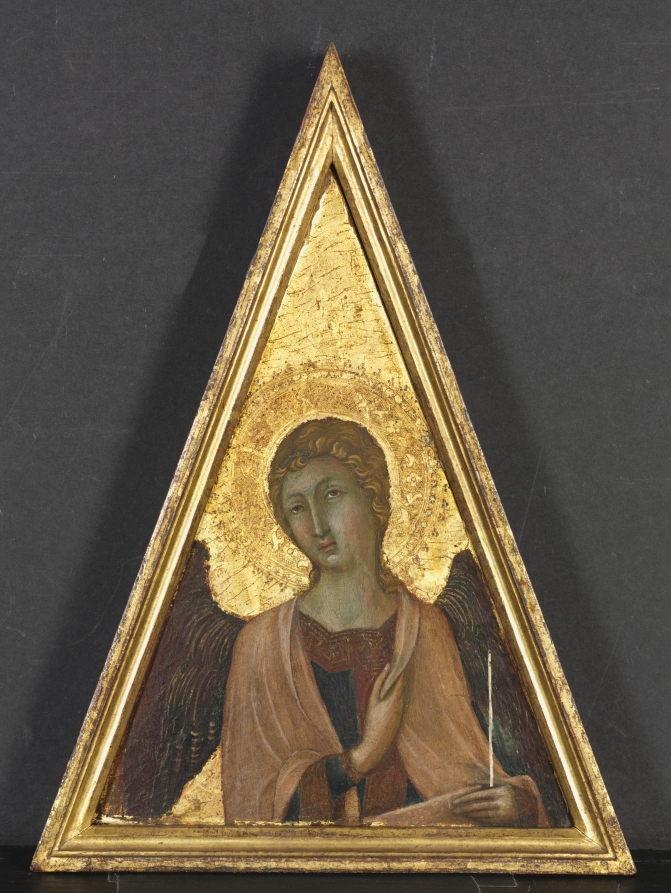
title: Pinnacle with Angel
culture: Italy, Siena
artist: circle of Niccolò di Segna (Italian)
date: c. 1340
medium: tempera and gold on wood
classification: Painting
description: These pinnacles were originally set on top of a multipanel altarpiece that has now been lost. The angels' gestures and glances suggest that they were placed to the left and right of a central image.